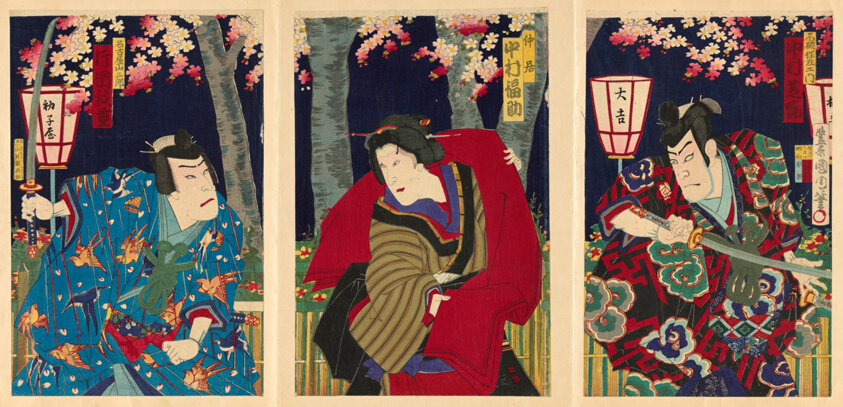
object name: Print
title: The actors Nakamura Shikan IV as Fuwa Banzaemon, Nakamura Fukusuke IV as the Maid, and Kataoka Gado III as Nagoya Sanzaburo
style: Japanese (culture or style)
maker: Toyohara Kunichika (Japanese, 1835-1900)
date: 1885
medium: Color woodblock print; oban triptych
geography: Japan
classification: woodblock print; print